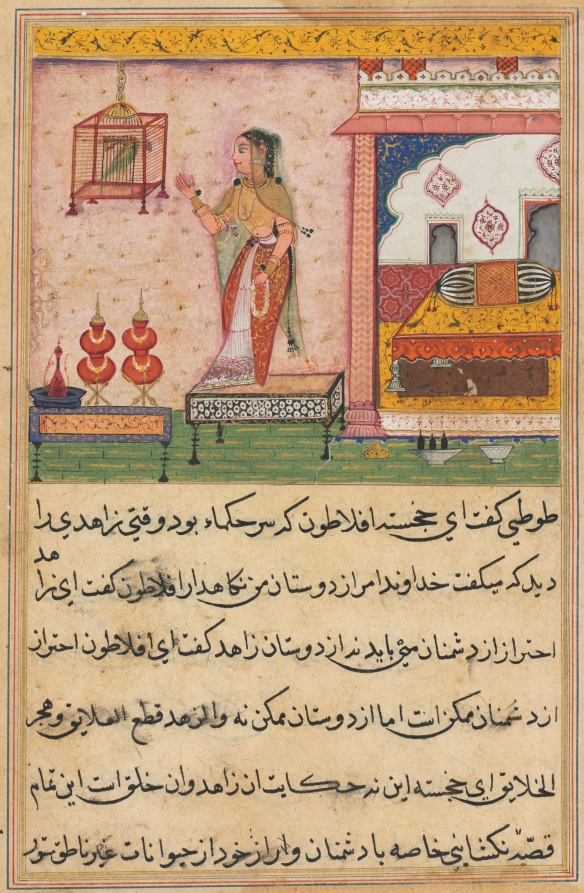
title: The Parrot Addresses Khujasta at the Beginning of the Twenty-third Night, from a Tuti-nama (Tales of a Parrot)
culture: Mughal India, court of Akbar (reigned 1556–1605)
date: c. 1560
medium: gum tempera, ink, and gold on paper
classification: Painting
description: On the twenty-third of fifty-two nights, Tuti the wise, talking parrot tells Khujasta the story of Kamjuy the wife of a raja, a group of laughing fish, and a boy who was born without a father. A stool painted beneath Khujasta’s feet negates the appearance that she is floating.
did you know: The parrot’s cage was originally painted gold.